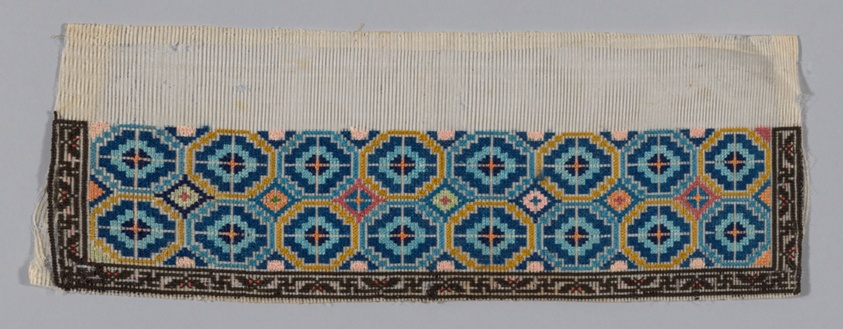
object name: Costume and Accessories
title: Band (from Woman's Trousers or Robe)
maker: China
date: 1875/1900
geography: China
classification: textile; needlework - costume; needlework (visual works); costume